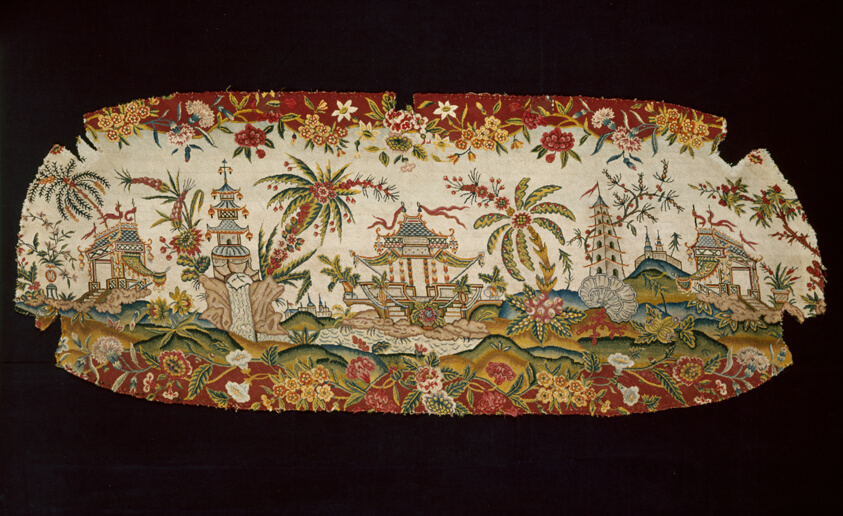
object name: Textile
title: Panel (From a Settee)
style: chinoiserie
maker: Probably England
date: 1745/55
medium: Linen, plain weave; embroidered with silk and wool in tent stitches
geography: England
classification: textile; needlework (visual works)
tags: foliage, cityscapes, flowers